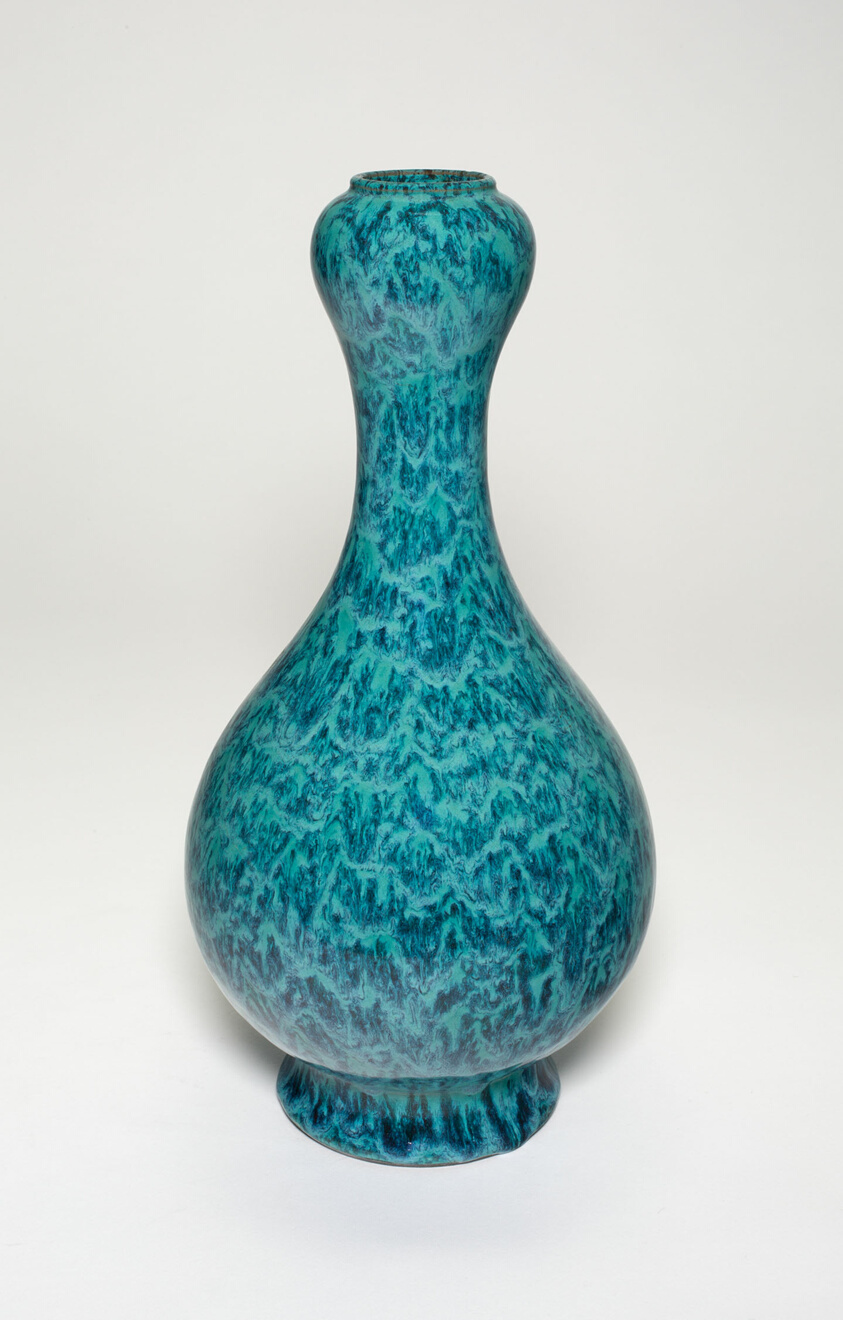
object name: Vessel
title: Bottle with Garlic-shaped Mouth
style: Chinese (culture or style)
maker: China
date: Qing dynasty, Qianlong reign (1736–1795)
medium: Porcelain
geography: China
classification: vase; vessel; porcelain; ceramics; asian art